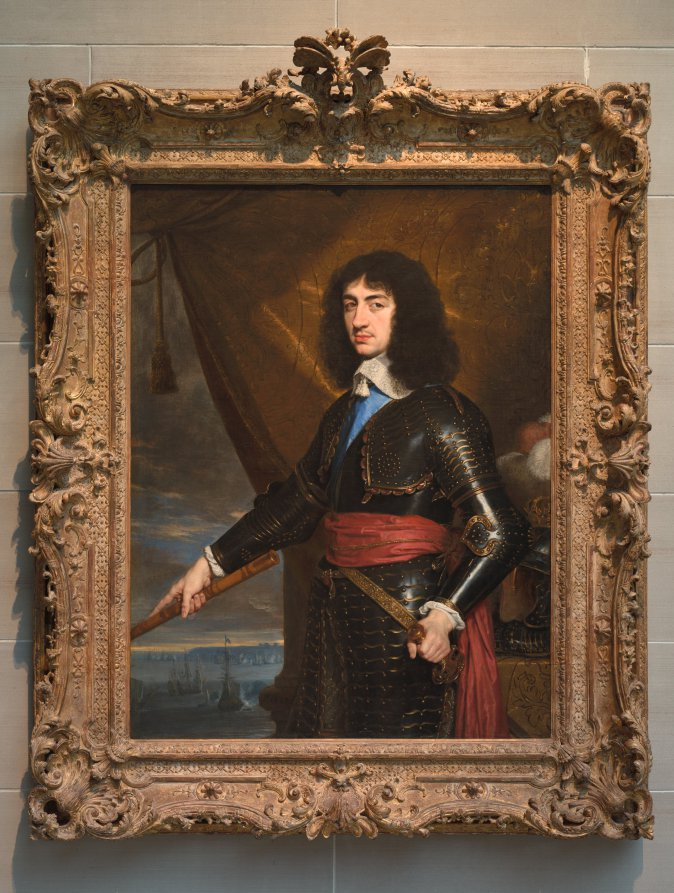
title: Portrait of King Charles II of England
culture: France, 17th century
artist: Philippe de Champaigne (French, 1602–1674)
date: 1653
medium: oil on canvas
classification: Painting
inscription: Inscribed lower center: "A°.1653"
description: Charles II (1630–1685) fled England in 1651 during the English civil war and commissioned this portrait during his exile in France. Charles II never fought on the battlefield, but he was the last British monarch to wear a full suit of armor, which represented his rank and status. The king gestures to the sea beyond the Dover cliffs, and the waiting fleet reveals his intention to return to England, which he did in 1660.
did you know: Charles is wearing a typical French cuirassier's armor. Meant for cavalry, the style indicates it was made around 1630 and was likely a gift as Charles would have been an infant at the time it was created.